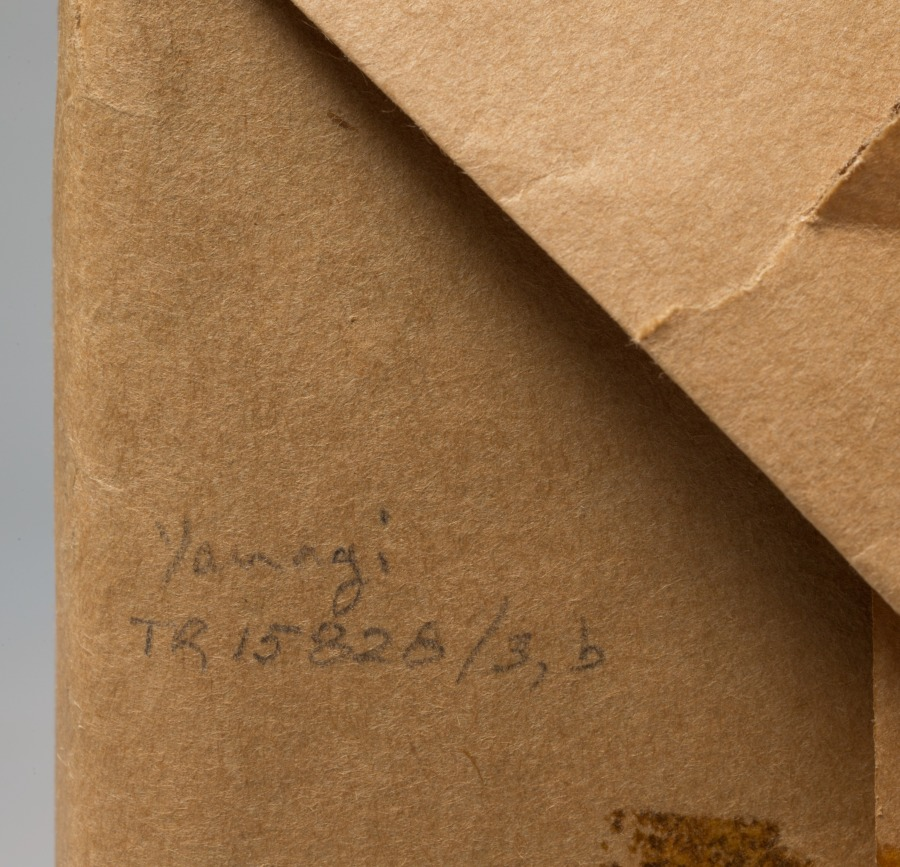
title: Spring Dancers (Manzai)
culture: Japan, Edo period (1615–1868)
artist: Miyagawa Chōshun (Japanese, 1683–1753)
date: early to mid-1700s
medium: hanging scroll; ink and color on paper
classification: Painting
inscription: Artist's signature and gourd-shaped seal lower right corner.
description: Manzai is the Japanese term for wandering comic dancers. The painting depicts one of the traditional pleasures of the spring season.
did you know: One performer is playing a hand-held drum, like CMA 1918.349.